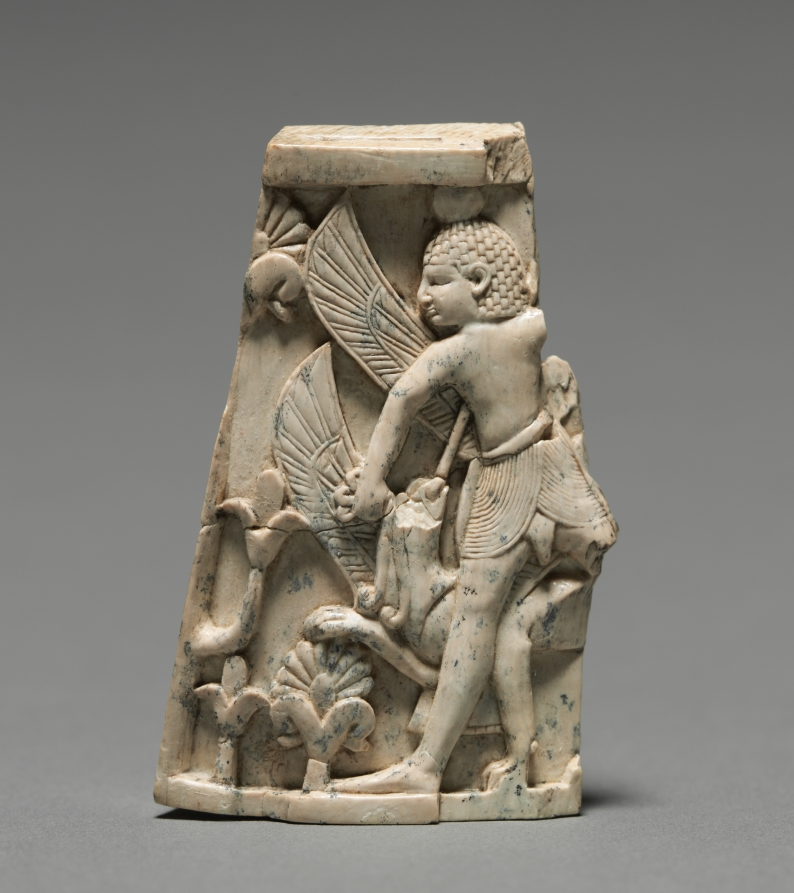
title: Decorative Plaque: Man; and Griffin in Combat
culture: Phoenicia, Iraq, Nimrud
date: 900–800 BCE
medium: ivory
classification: Ivory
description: This small plaque was executed in the Phoenician style with symmetrical compositions, elongated figural proportions, and Egyptian subjects and motifs. Examples have been found throughout the Middle East, but thousands come from Nimrud where most were excavated in the storerooms of a military arsenal built by King Shalmaneser II (858-824 bc). When the Nimrud palace was sacked in the 7th century bc, these ivories were thrown into a well, where Sir Max Mallowan (the husband of Agatha Christie) discovered them in 1951. The monumental wall relief (1943.246) was found at the same Assyrian palace at Nimrud.